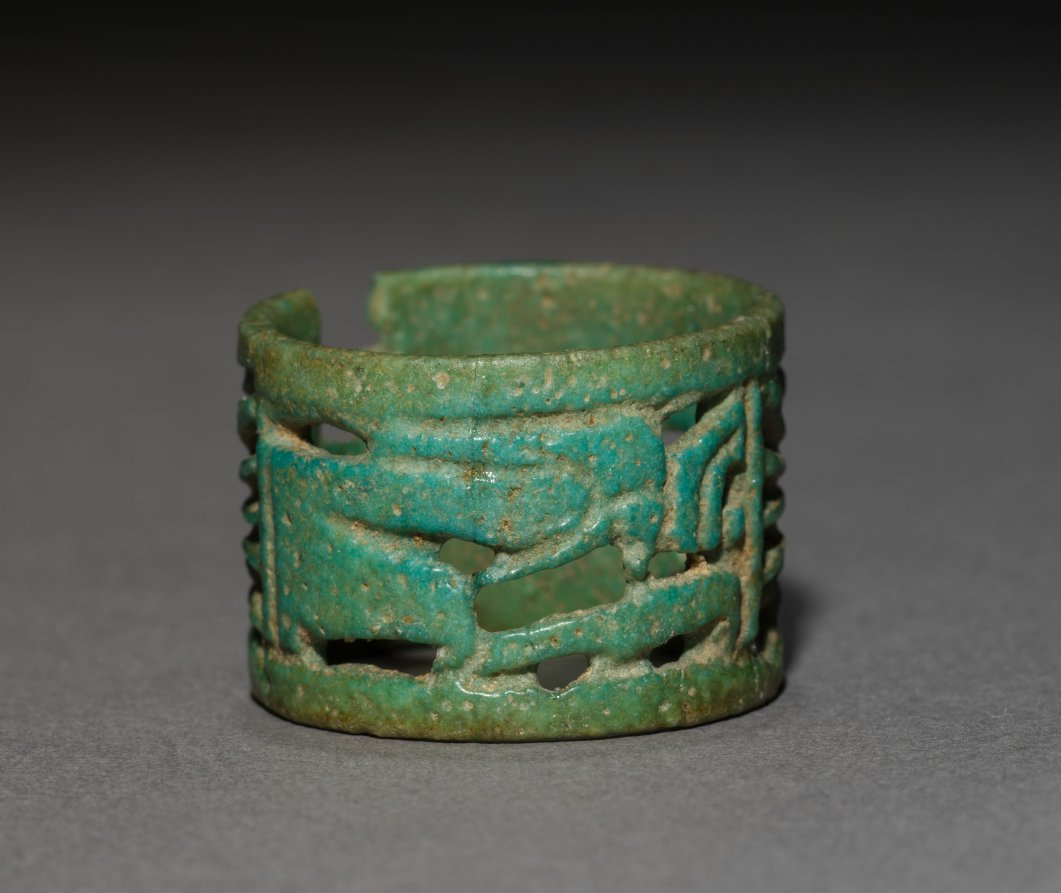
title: Openwork Ring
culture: Egypt, Third Intermediate (1069–715 BCE), Dynasties 21–22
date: 1069–715 BCE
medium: turquoise faience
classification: Jewelry